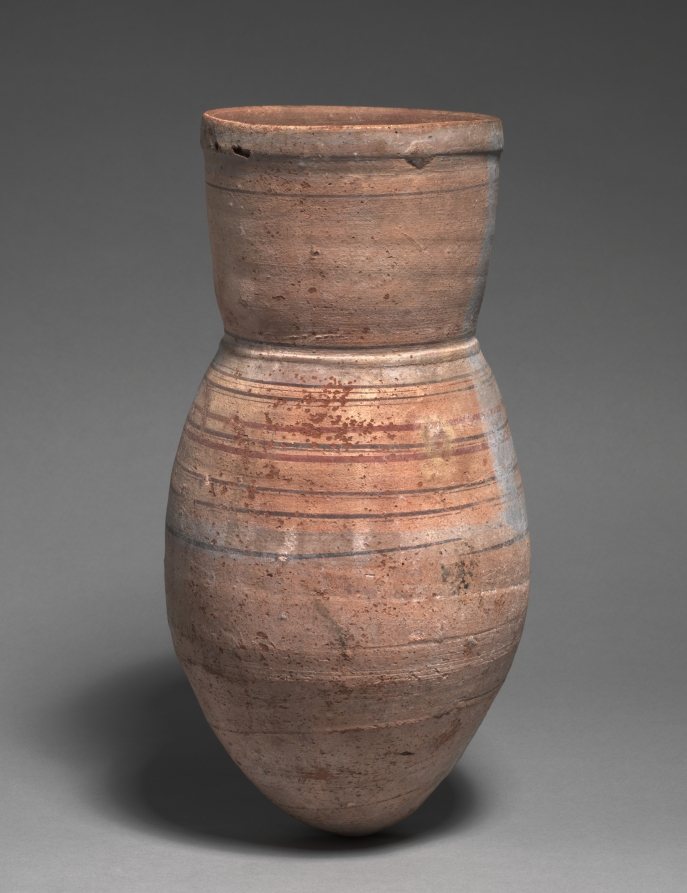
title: Hathor Jar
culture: Egypt, probably Malqata, New Kingdom (1540–1069 BCE), Dynasty 18, reign of Amenhotep III (1390–1352 BCE)–reign of Akhenaten (1351–1334 BCE)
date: 1391–1337 BCE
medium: Nile silt ware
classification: Vessels